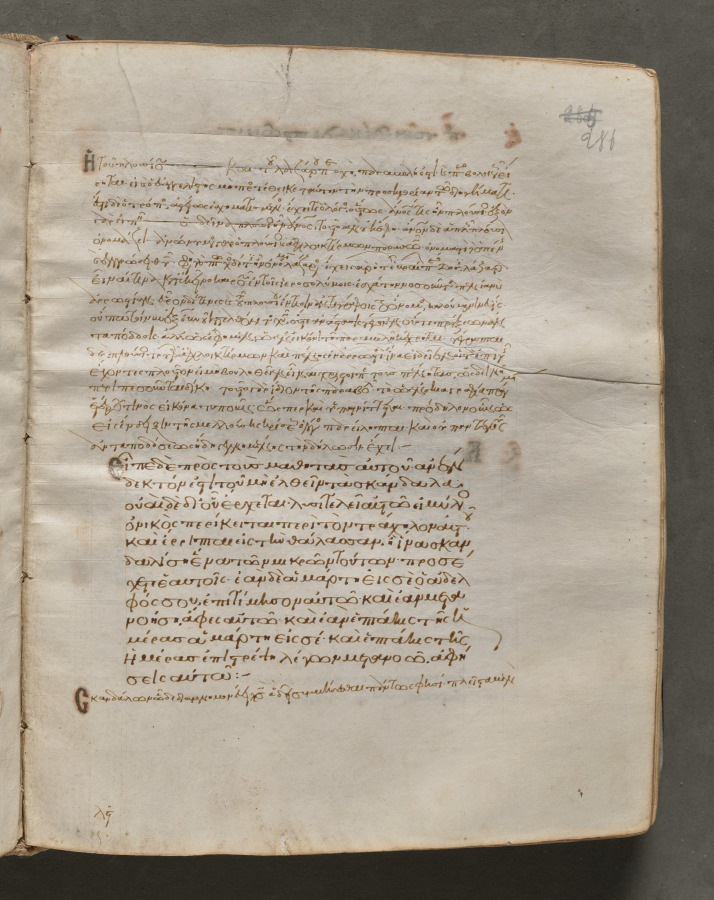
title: Text, folio 286 (recto), from a Gospel Book with Commentaries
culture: Byzantium, Constantinople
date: c. 1000–1100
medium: ink, tempera, and gold on vellum; leather binding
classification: Bound Volume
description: Each of the four gospels in this book opens on a page with brilliantly illuminated borders depicting the author of the text as well as birds—principally peacocks, symbols of the immortality of the soul—and fountains, representing the fountain of life and the salvation of the soul. This volume consists of 428 leaves with texts in Greek. Its level of sophistication suggests that it was probably written and decorated in a monastery in Constantinople.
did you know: Gospel books were carried in procession through Byzantine churches.